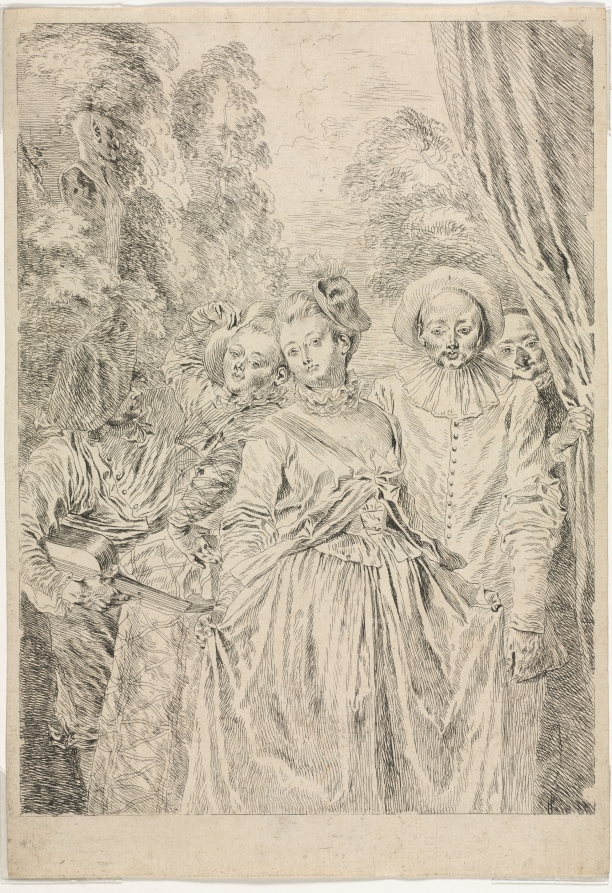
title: The Clothes are Italian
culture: France, 18th century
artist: Jean-Antoine Watteau (French, 1684–1721)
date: 1715–16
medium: etching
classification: Print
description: Actors dressed as stock characters from the Italian commedia dell’arte and the French popular theater take their final bow in this print. Known for their comic plots and improvisational satire, the Italian players were banned in France from 1697 until 1716 after one of their productions was thought to criticize King Louis XIV’s mistress. Still in demand with French audiences, some of the characters and stories were adapted into the less regulated popular performances. The sense of whimsy and play associated with this form of theater is mirrored by the spontaneity and freedom of the artist's etched lines.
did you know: Jean-Antoine Watteau’s compositions often reference theater and music.